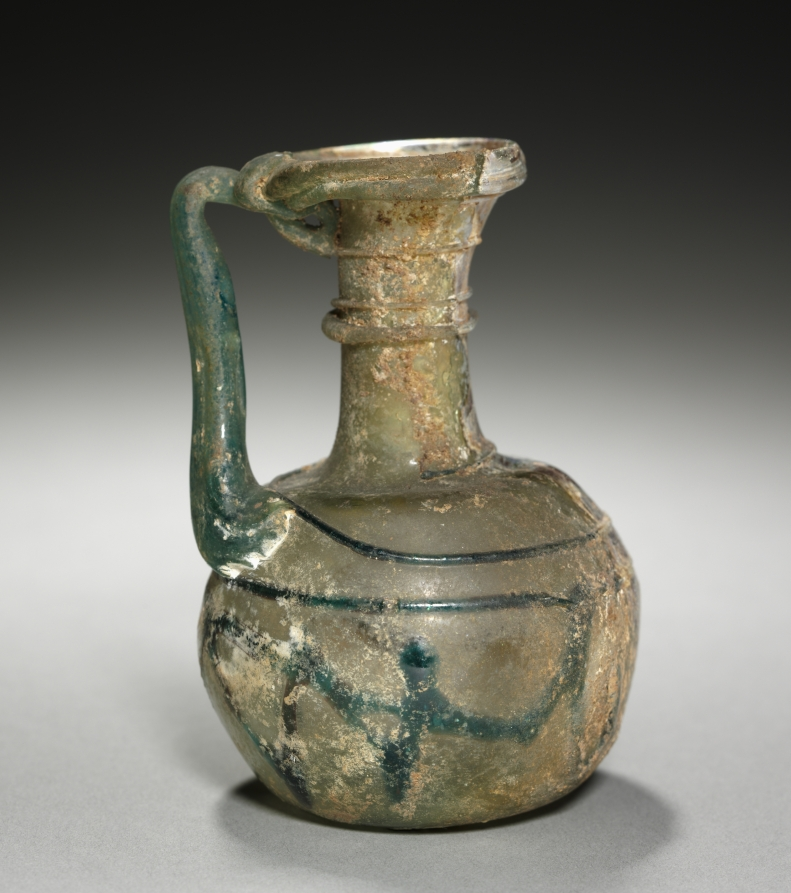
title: Squat Juglet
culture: Italy, Roman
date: 300–500 CE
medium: green glass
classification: Glass